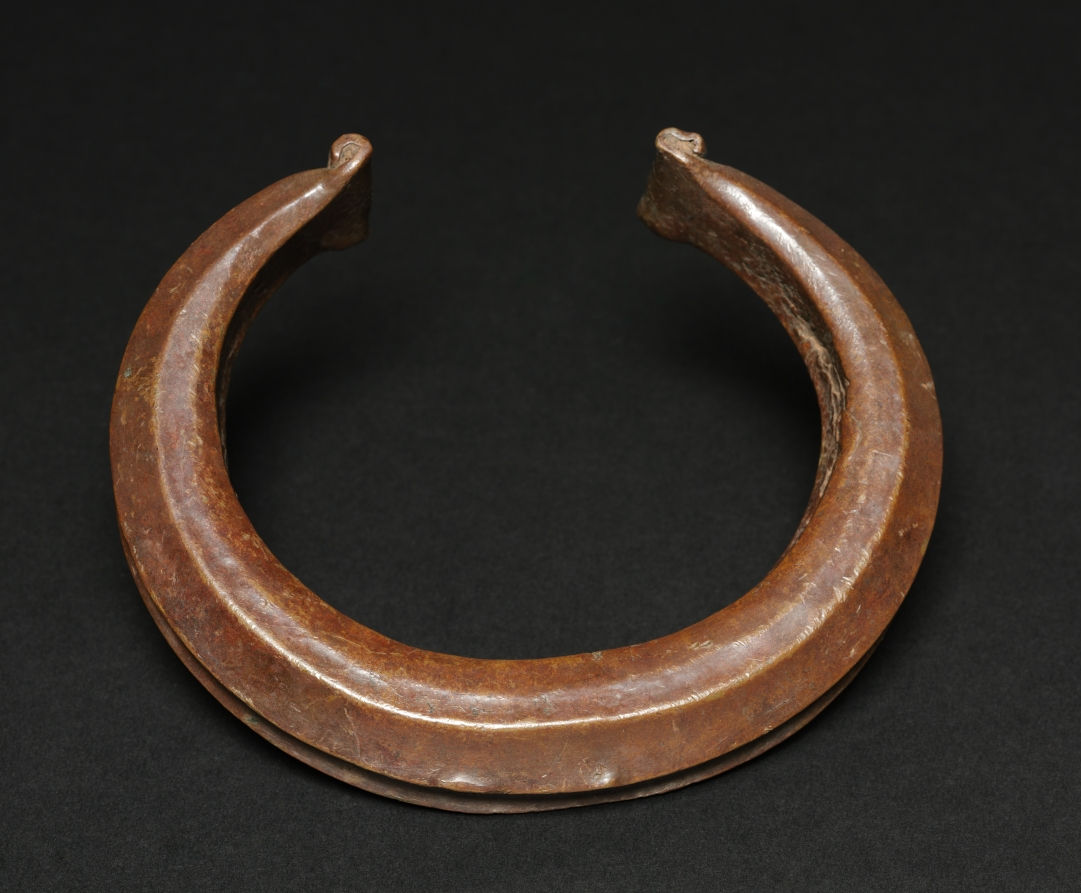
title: Neck Ring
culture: Africa, Central Africa, Gabon, Fang-style maker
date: 1900s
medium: Copper alloy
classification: Jewelry